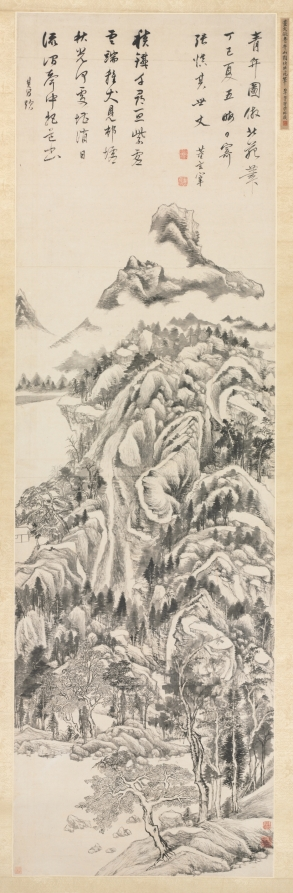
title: Mt. Qingbian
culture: China, Ming dynasty (1368–1644)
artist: Dong Qichang (Chinese, 1555–1636)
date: 1617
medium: hanging scroll, ink on paper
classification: Painting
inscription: Artist's first inscription, signature, and 2 seals: A painting of the Qingbian Mountains in the manner of Beiyuan [Dong Yuan]. In the summer of the dingsi year [1617], on the last day of the fifth month, [I] send this to my senior, Zhang Shenqi. Dong Xuanzai [seals] Zhi zhi hao ri jiang guan 知制誥日講官; Dong Qichang yin 董其昌印.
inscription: Artist's second inscription and signature: Piling irons for ten thousand feet guard the purple sky;/ Where puppies are seen on top of clouds, villages and marketplaces lie./ In the splendor of autumn, where is the most worthy spot to spend the day?/ Amid the rustling sounds of mountain streams, with a volume in hand, meditating on the Way [Dao]. Inscribed by Qichang. (trans. WKH/LYSL)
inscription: 4 additional seals: 3 of Li Enqing 李恩慶 (jinshi of 1833); 1 of Weng Wan-go 翁萬戈 (b. 1918).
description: Dong Qichang radically transforms the landscape composition into a purely abstract design. He organizes the mountain forms to achieve an overall sense of structure, activating the flow of energy (qi) and the momentum of force (shi) throughout the pictorial design. In his art, brush and ink assume life independent of the depicted forms, so that the painting can be appreciated for “the sheer marvels of brush and ink.”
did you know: Dong Qichang had visited the Bian Mountains, which are part of a low range located not far from Wuxing and Lake Tai in the southern province of Zhejiang.